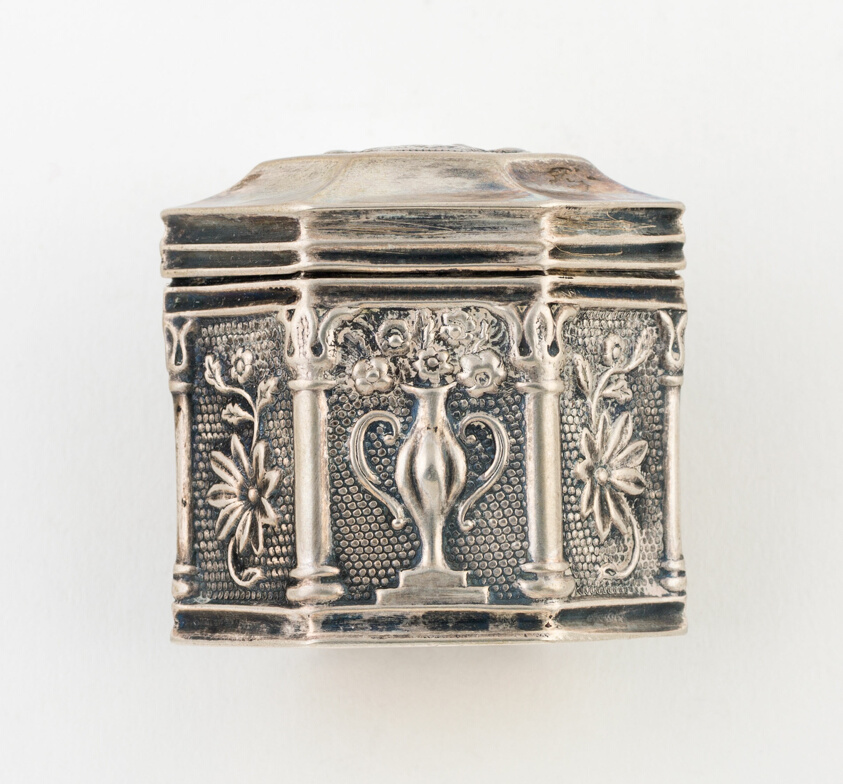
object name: Metalwork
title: Sponge Box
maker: Possibly Netherlands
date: c. 1900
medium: Silver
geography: Netherlands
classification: container for personal use; box; european decorative arts; metalwork; silver; decorative object/ornament